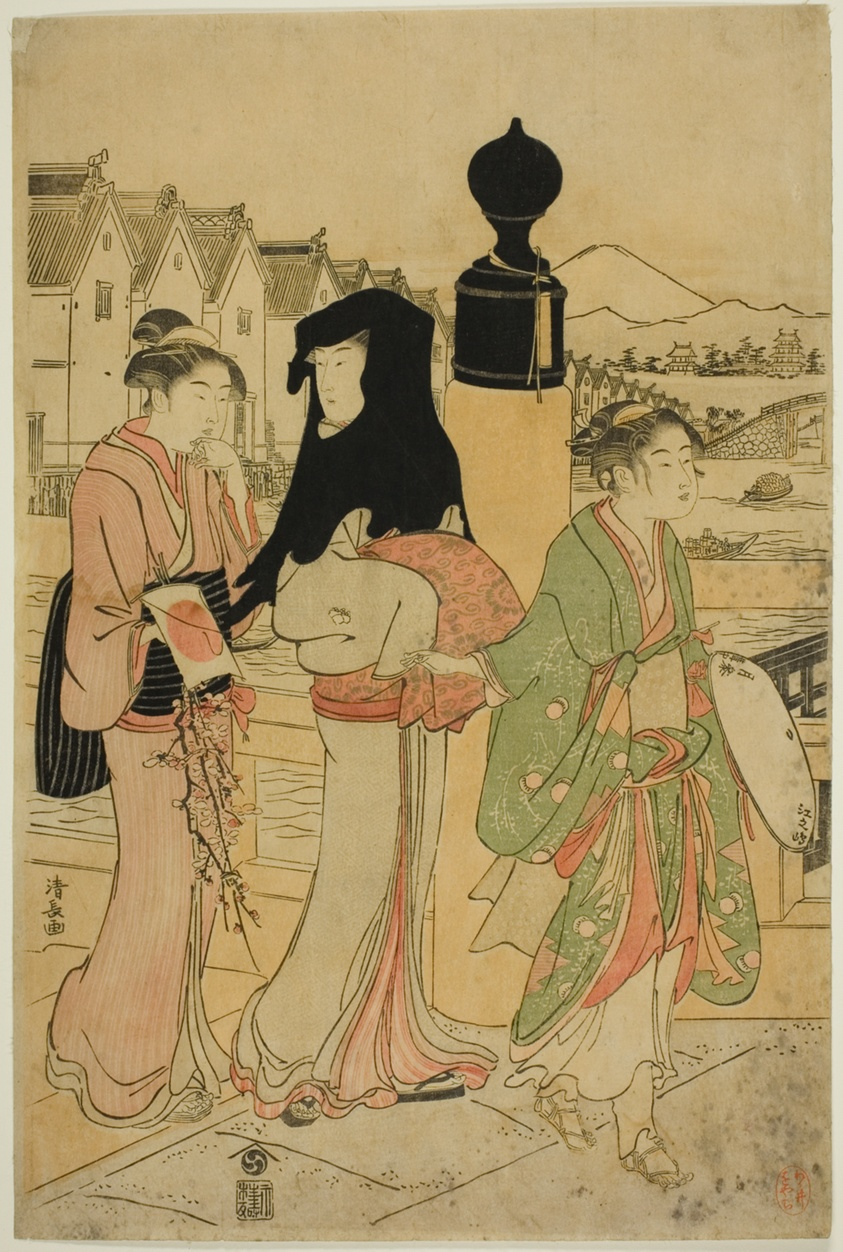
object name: Print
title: Women Crossing Nihonbashi Bridge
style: Japanese (culture or style)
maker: Torii Kiyonaga (Japanese, 1752-1815)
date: c. 1786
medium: Color woodblock print; left sheet of oban diptych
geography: Japan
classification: woodblock print; print; asian art